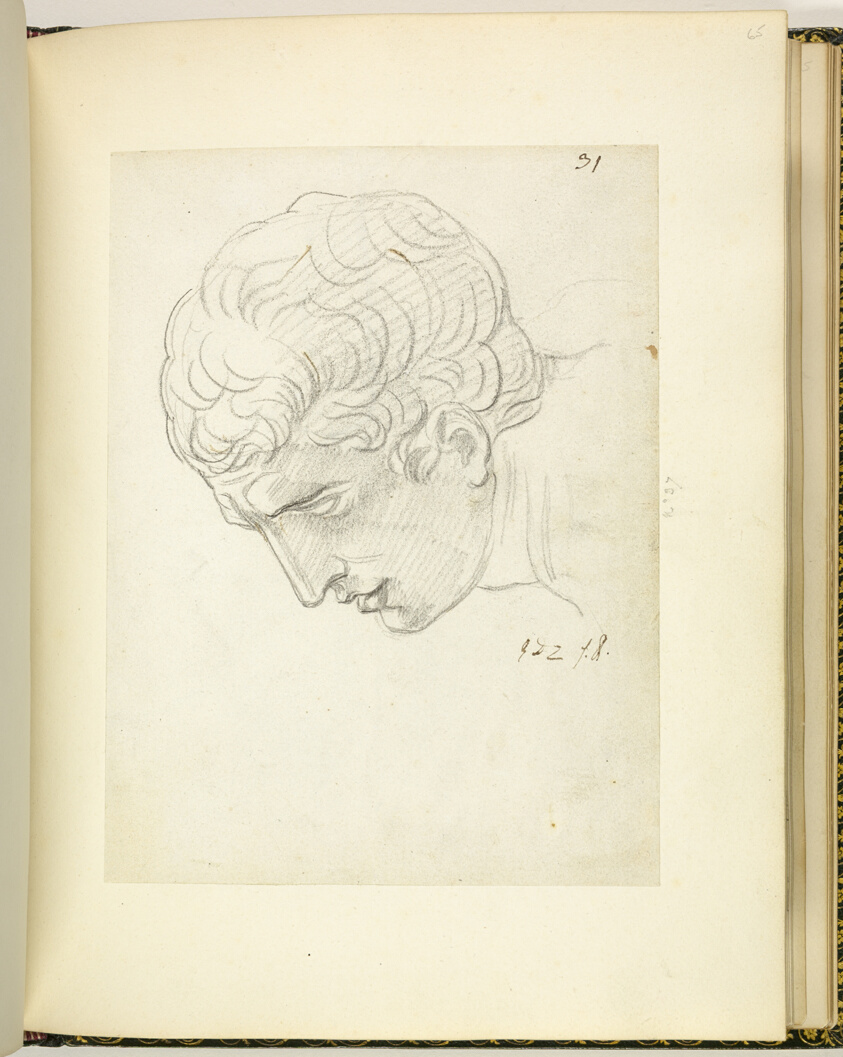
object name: Drawing and Watercolor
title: Sketchbook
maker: Jacques-Louis David; French, 1748-1825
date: 1809–10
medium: Graphite, black chalk, black crayon, and pen and brown ink drawings on wove paper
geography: France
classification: sketchbook; chalk; prints and drawing; paper